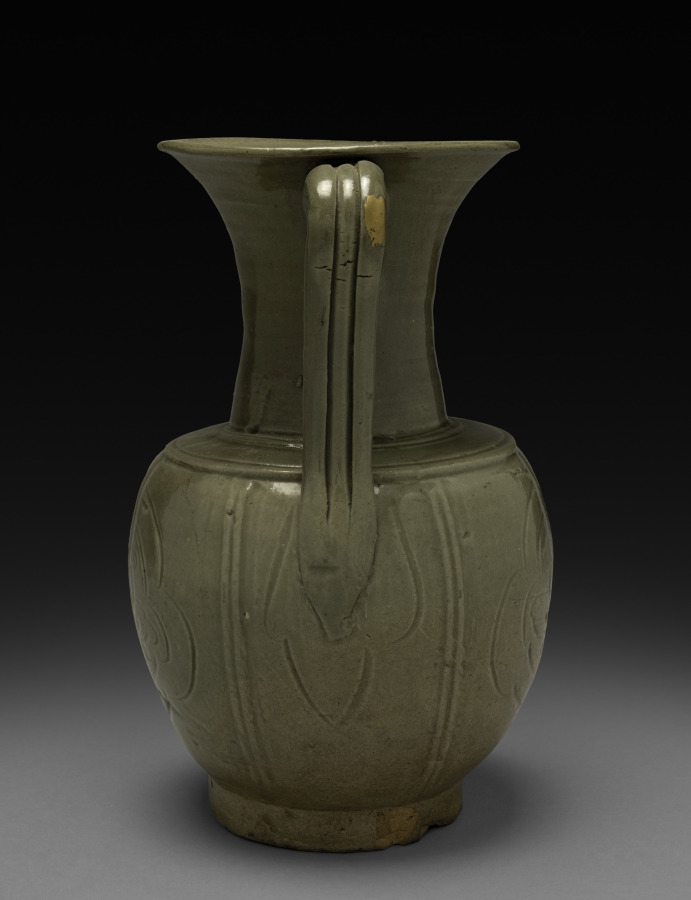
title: Wine Jug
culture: China, Zhejiang province, Shang-lin-hu type, Five dynasties (907–960) to Song dynasty (960–1279)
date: 900s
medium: glazed gray stoneware, Yue ware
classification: Ceramic